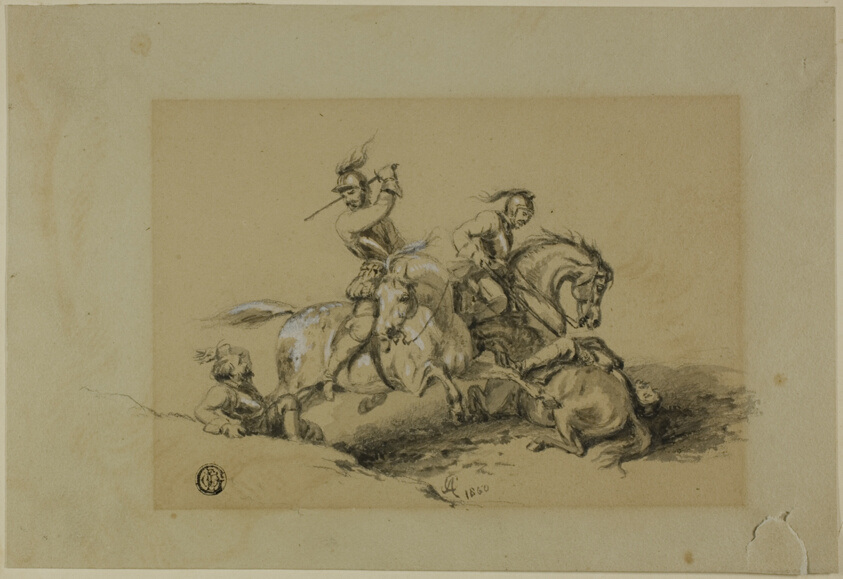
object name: Drawing and Watercolor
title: Cavaliers' Fight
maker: Unknown Artist; French, n.d.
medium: Brush and brown and gray wash, with graphite, heightened with white gouache, on gray wove paper (discolored to tan), tipped on cream wove card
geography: France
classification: ink or chalk wash; drawings (visual works); prints and drawing